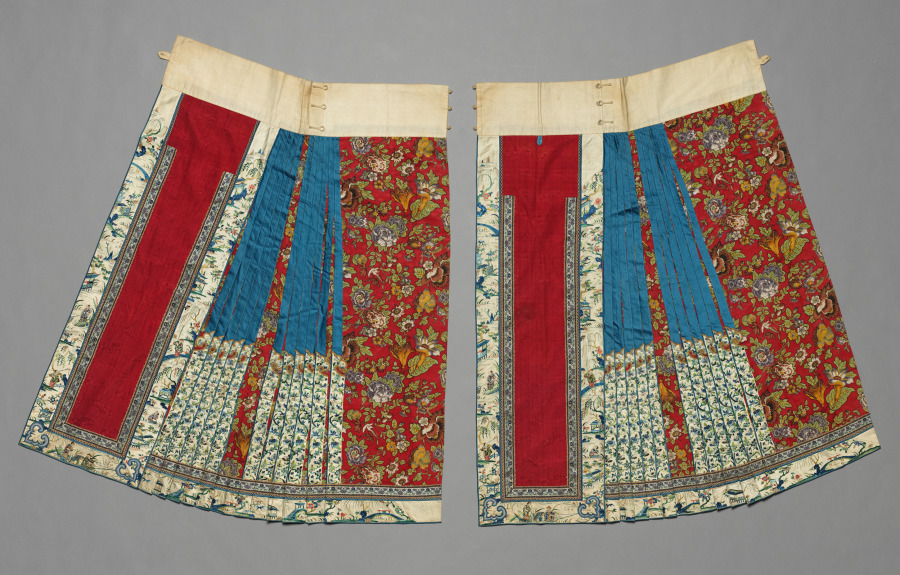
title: Skirt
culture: China, Qing dynasty (1644-1911)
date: 1800s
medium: Silk, cotton: embroidery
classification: Garment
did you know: This skirt includes both embroidered sections and polychrome printed fabric.